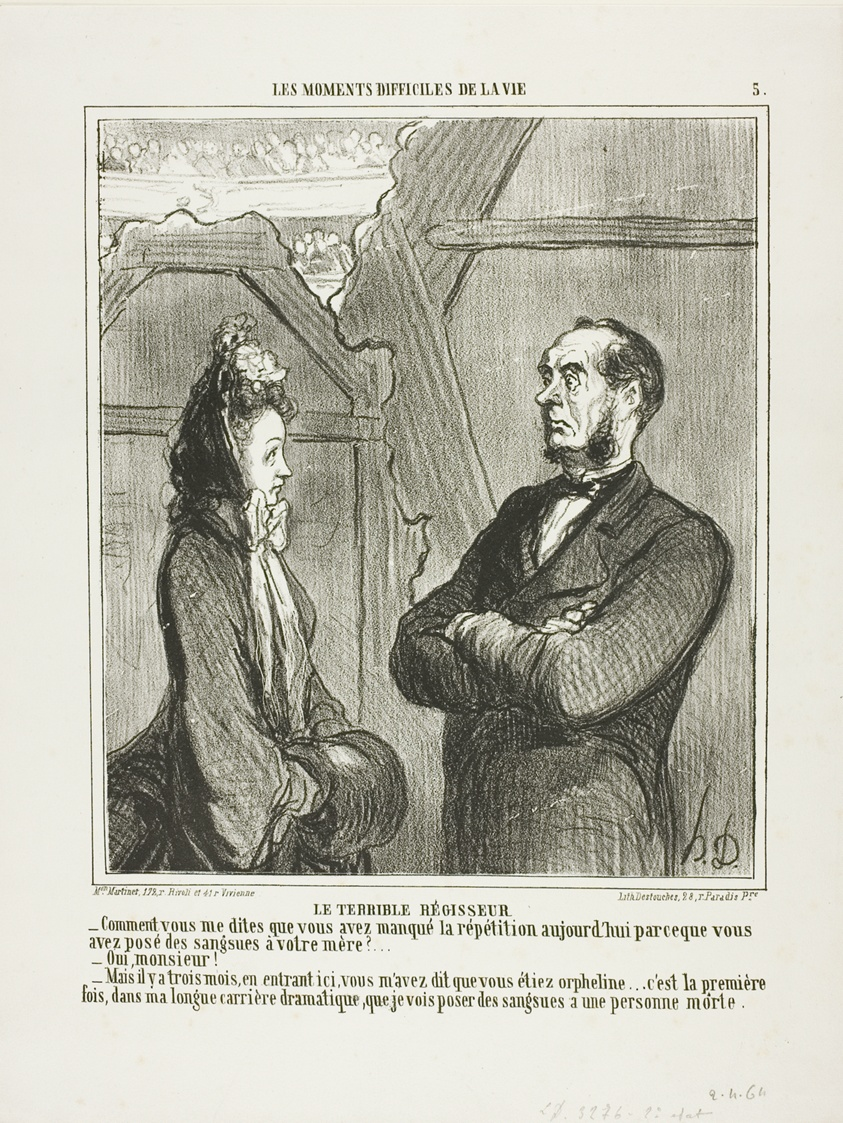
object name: Print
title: The Terrible Director. “- Indeed! You are telling me that you missed today's rehearsal because you had to set leeches onto your mother? - Yes sir. - But, when you first came here three months ago, you told me that you were an orphan. This is the first time in my long career at the theater that I have met a person who sets leeches on the body of a dead person,” plate 5 from Les Moments Difficiles De La Vie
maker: Honoré Victorin Daumier; French, 1808-1879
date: 1864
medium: Lithograph in black on white wove paper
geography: France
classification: lithograph; print; prints and drawing